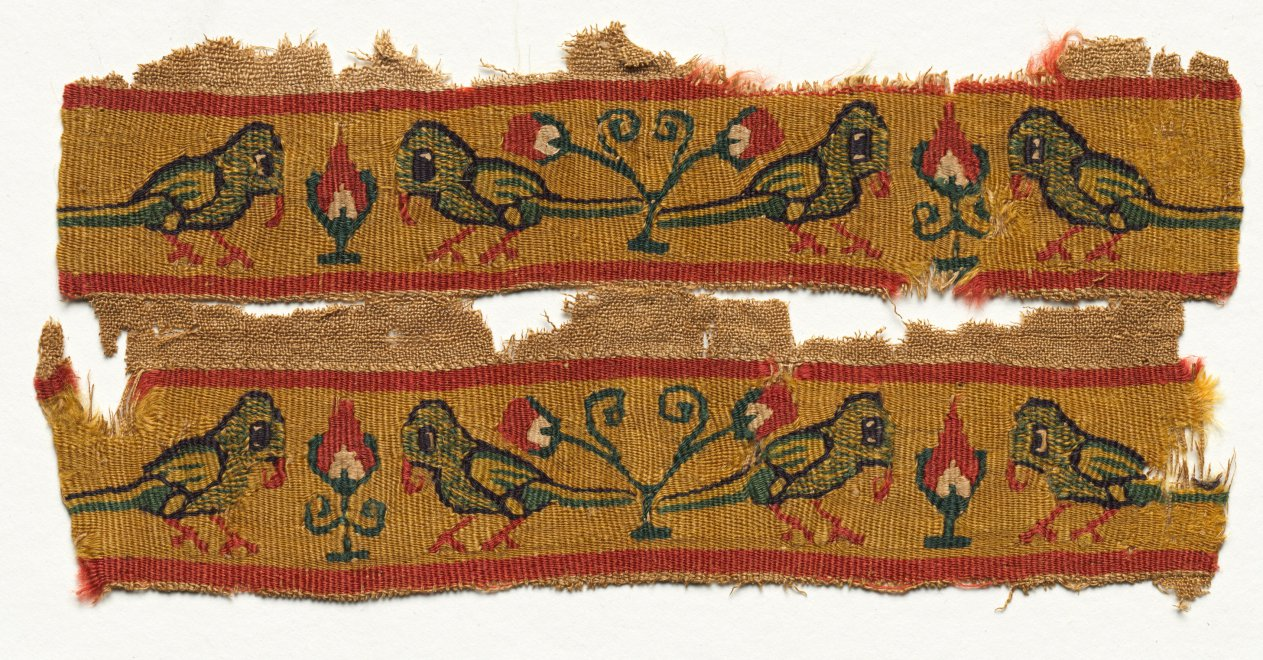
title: Sleeve Bands from a Tunic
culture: Egypt, Umayyad period (661–750)?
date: 600s–700s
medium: Wool and linen: tabby weave, inwoven tapestry ornament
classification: Textile